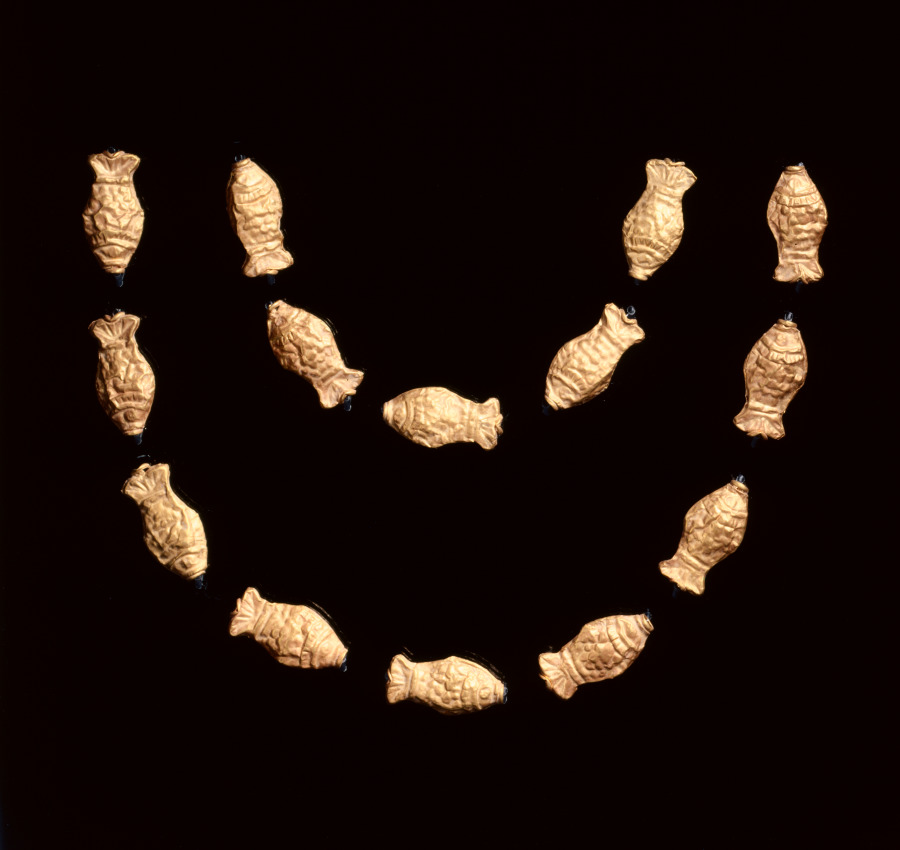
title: Necklace Beads in the Form of Fish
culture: India, Shunga period (185–78 BCE)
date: 185–72 BCE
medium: gold repoussé with granulation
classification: Jewelry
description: Jewelry in ancient India often consisted of elements associated with water, such as fish and other aquatic plants and animals. Since water is essential for life, imagery that connotes water is life-affirming, or auspicious, and therefore appropriate adornment.